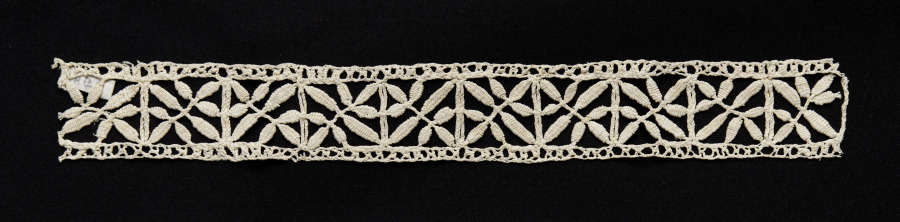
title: Lace Insertion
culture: Italy, Genoa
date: 1550–99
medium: Bobbin lace (needle lace, reticella design)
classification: Lace